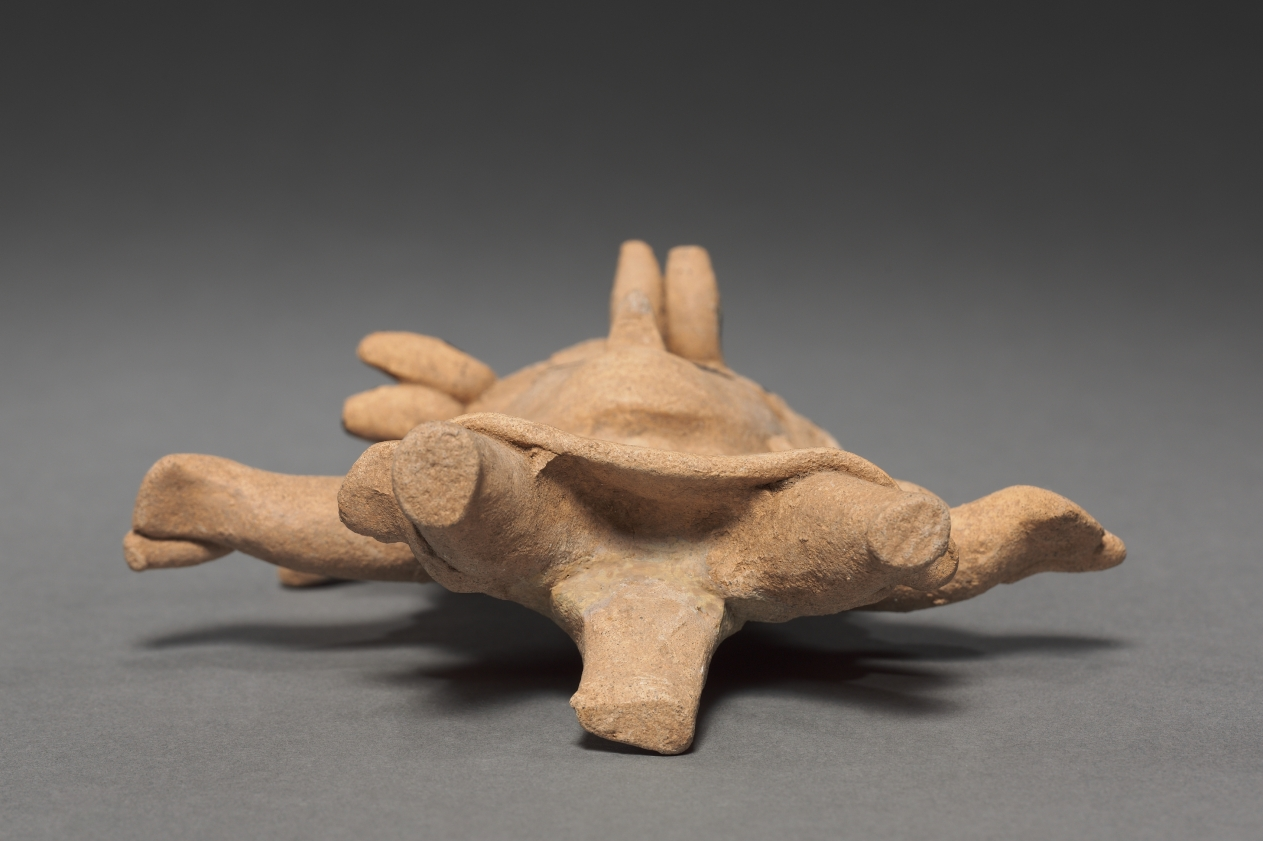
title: Tripod Whistle Figurine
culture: Mexico, Veracruz, Remojadas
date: c. 150–1 BCE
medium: earthenware with asphalt paint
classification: Sculpture